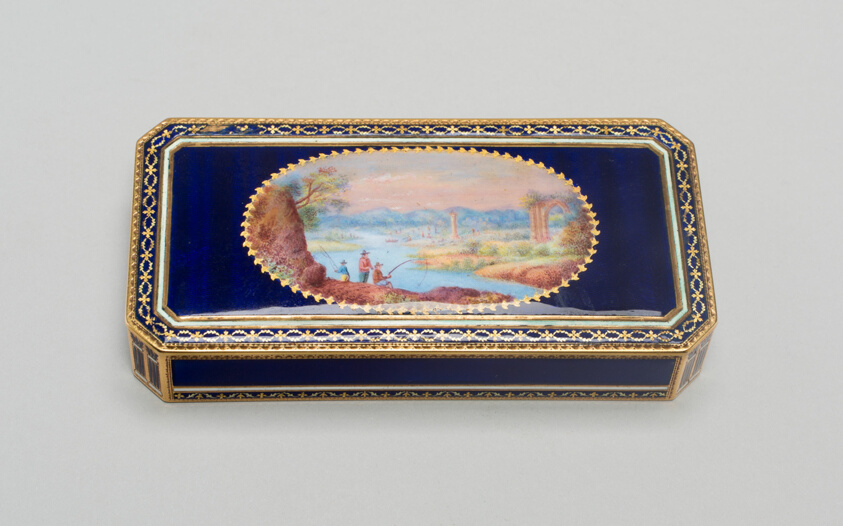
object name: Metalwork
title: Snuff Box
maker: Geneva, Switzerland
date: c. 1780/1810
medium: Gold and enamel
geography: Switzerland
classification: snuff box; european decorative arts; metalwork